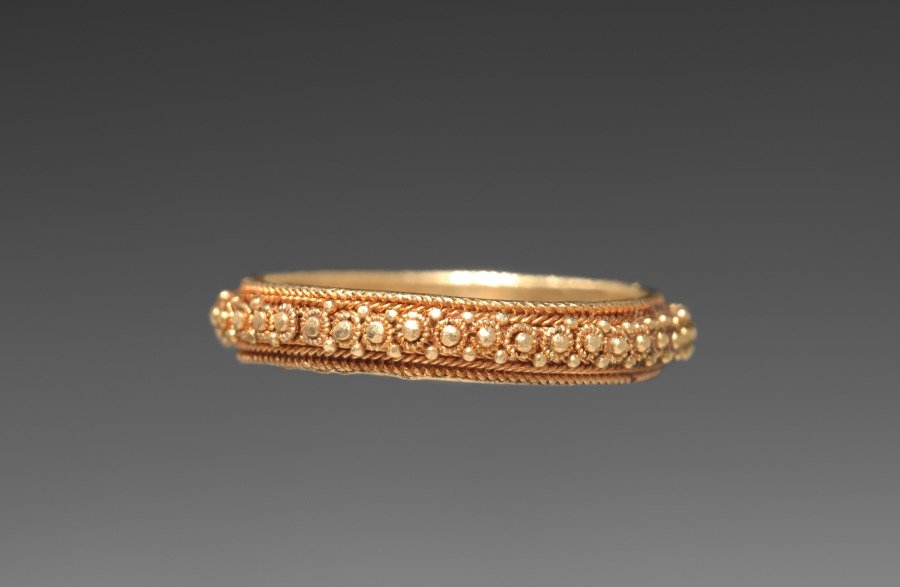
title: Ring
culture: Cambodia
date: 1900s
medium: gold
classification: Jewelry